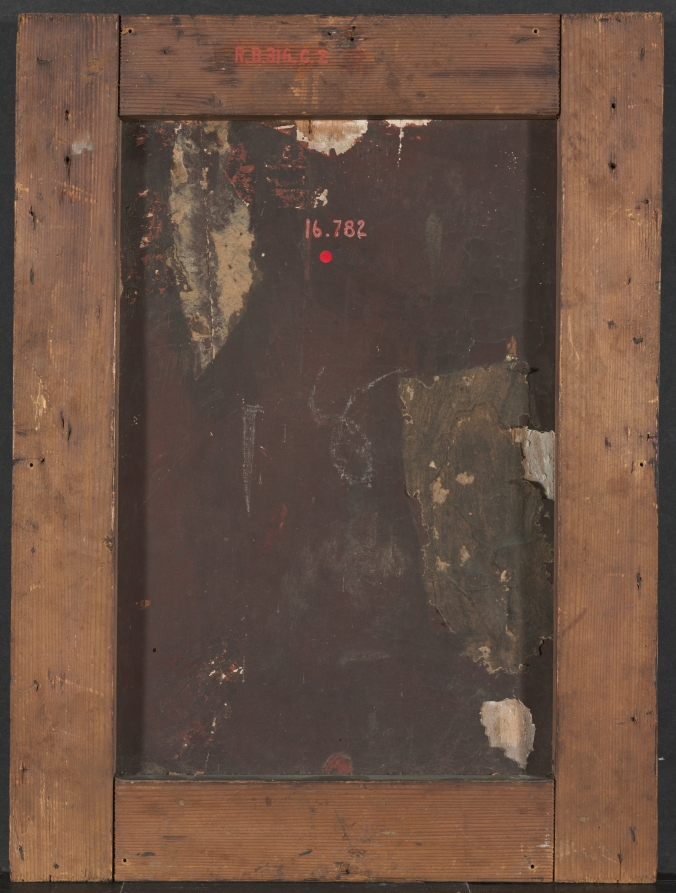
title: Adoration of the Shepherds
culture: Northern Italy, late 15th-early 16th Century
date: c. 1500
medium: oil on wood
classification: Painting